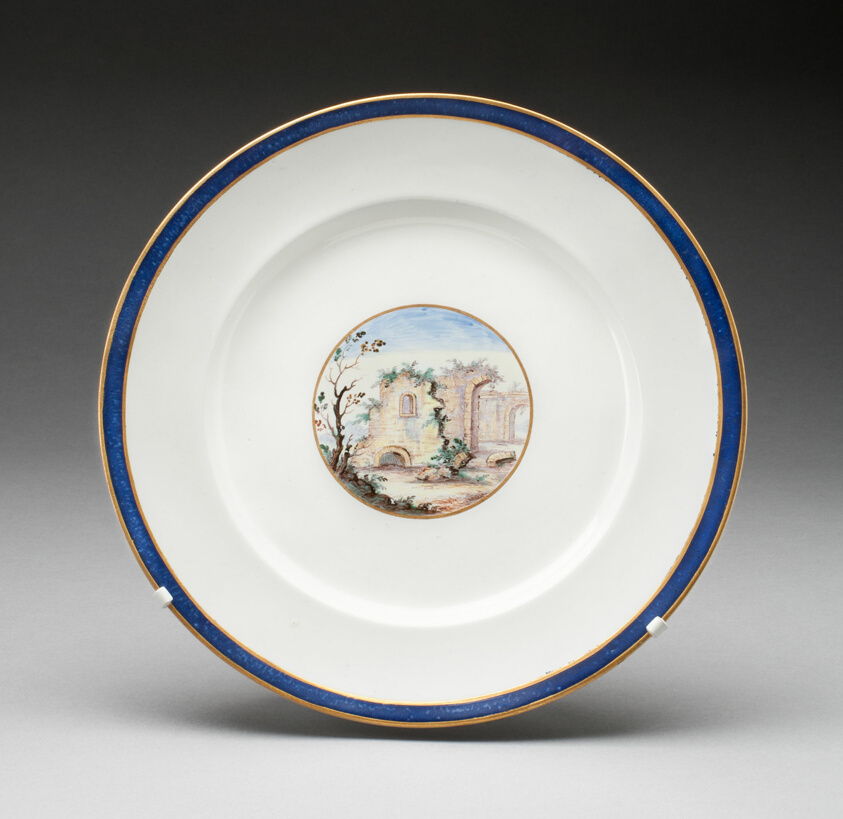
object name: Ceramics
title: Plate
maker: Italy, Naples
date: Early 19th century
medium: Soft-paste porcelain with polychrome enamels and gilding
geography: Naples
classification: plate (general, dish); tableware; dish (vessel); ceramics; porcelain; european decorative arts